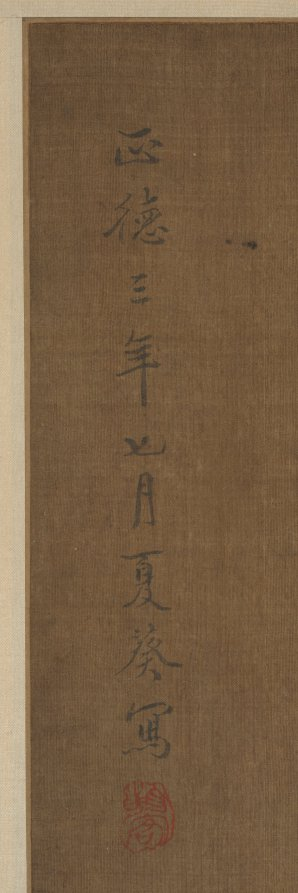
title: Children at Play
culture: China, Ming dynasty (1368–1644)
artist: Xia Kui (Chinese, active c. 1405–1445)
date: 1508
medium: hanging scroll; ink and color on silk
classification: Painting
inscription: 正德三年七月夏葵寫 [Zhengde san nian qi yue Xia Kui xie]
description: Sixteen children engage in scholarly, religious, and military activities, representing the popular “one hundred boys” theme expressing the wish for abundant, successful male offspring. Such paintings conveying auspicious wishes were often displayed during the New Year festival season. Two older boys wear small crowns with red tassels. Another child with a mask holds a brush in one hand, a rice measure in the other. He stands on a low table imitating Kuixing, the God of Examinations and servant to the God of Literature.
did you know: In the foreground on the right are three boys playing a kind of blind man’s bluff.